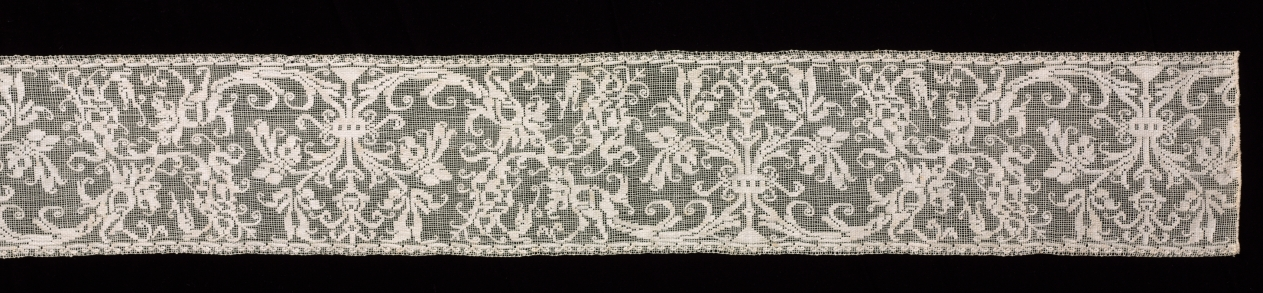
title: Band with Scroll Pattern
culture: Italy, Sicily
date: 1500s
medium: Bleached linen (est.): needle lace, burato (twined ground and darned in one direction)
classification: Lace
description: A scrolling vine with budding vegetation or a tendril is a recurring pattern in needle lace. The frequent use of the motif, adapted in lace from different centuries and regions, suggests that it was found in a pattern book. Here, the pattern is excessively ornate with additional swirling motifs and flourishing vases.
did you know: Books of patterns for lace making and other needlework were aimed at well-to-do women and girls to encourage domestic virtue.